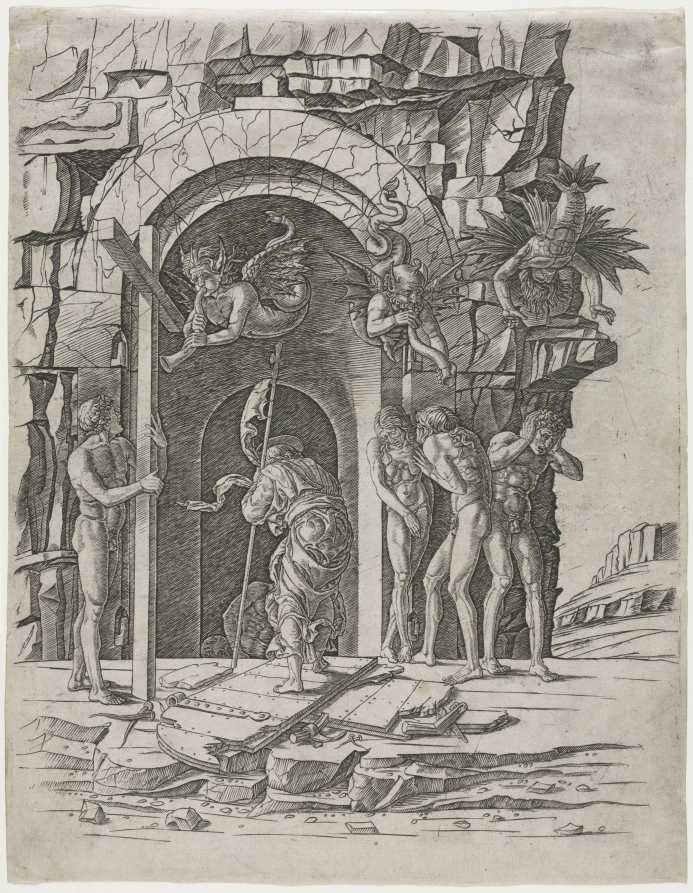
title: Descent into Limbo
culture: Italy, 15th century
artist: attributed to Andrea Mantegna (Italian, about 1431–1506)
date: late 1460s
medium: engraving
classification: Print